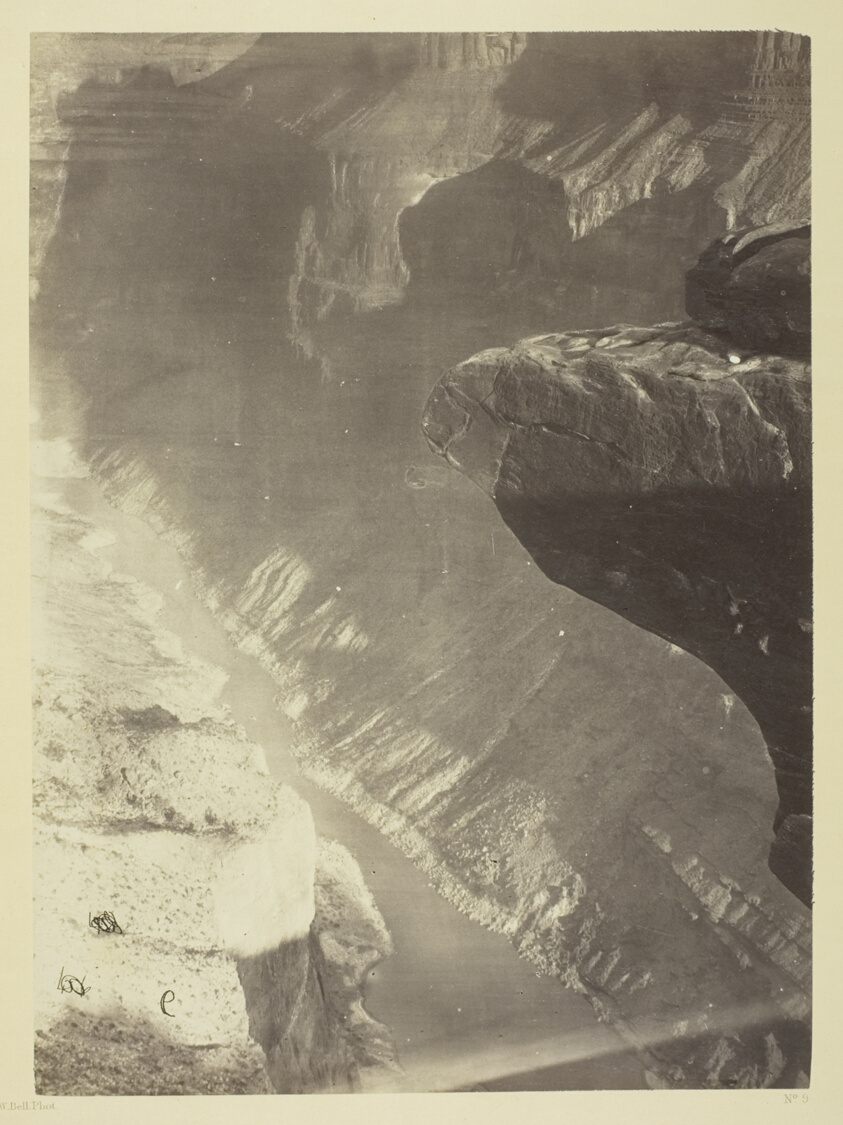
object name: Photograph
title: Looking South into the Grand Cañon, Colorado River, Sheavwitz Crossing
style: 19th century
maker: William H. Bell (American, 1830–1910)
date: 1872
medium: Albumen print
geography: United States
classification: albumen print from collodion negative; photograph; photography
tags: Collected by Hugh Edwards